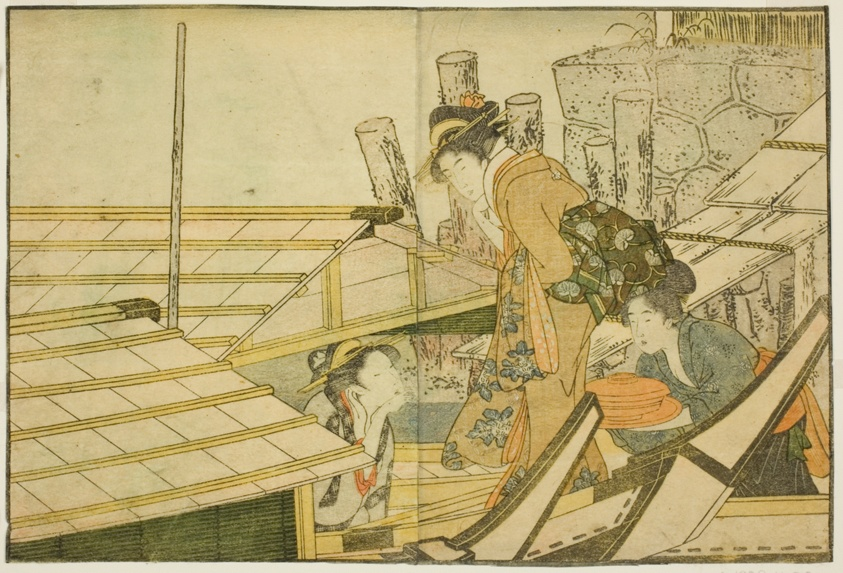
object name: Print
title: Embarking on Pleasure Boats in Summer, from the illustrated book "Picture Book: Flowers of the Four Seasons (Ehon shiki no hana)," vol. 1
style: Japanese (culture or style)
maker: Kitagawa Utamaro 喜多川 歌麿; Japanese, 1753 (?)-1806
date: New Year, 1801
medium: Color woodblock print; double-page illustration from book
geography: Japan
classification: woodblock print; print; asian art